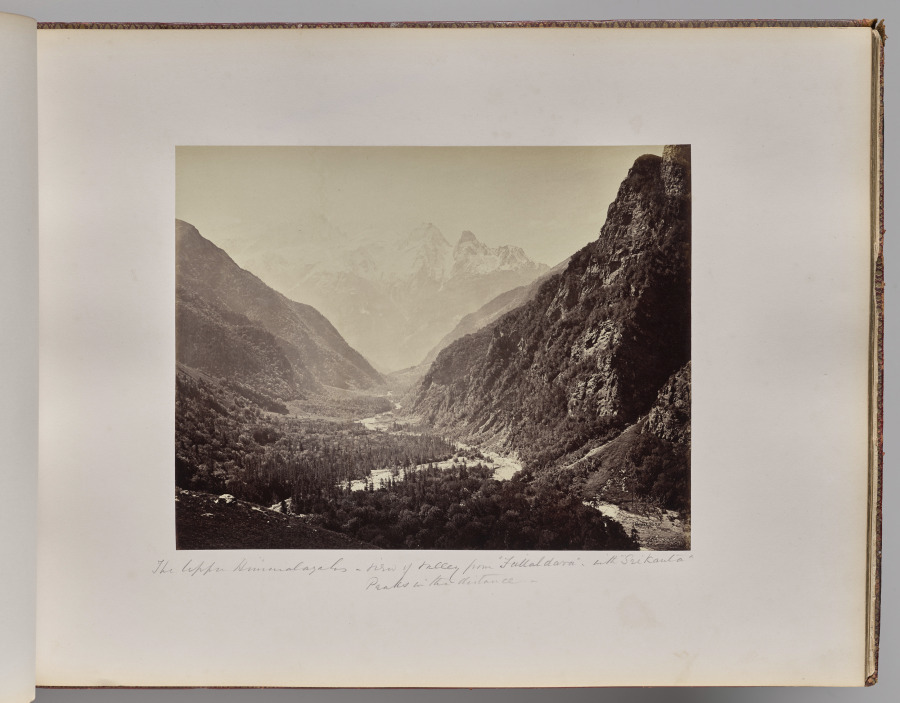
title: The Upper Himmalayahs. View of Valley from Fallaldasa with Srikanta Peaks in the Distance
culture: England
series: Photographs of Northern India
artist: Samuel Bourne (British, 1834–1912)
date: 1863–70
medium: albumen print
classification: Photograph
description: The 50 images in this album, all taken in the 1860s, move from the hill towns of the Himalayas down to cities including Lahore (now in Pakistan), Delhi, Lucknow, Agra, Benares (now Varansi), and Calcutta (now Kolkata). Architectural studies of major monuments offer valuable historical records of what sites such as the Taj Mahal and the imperial mosque of the Mughal emperors in Delhi looked like before twentieth-century restorations.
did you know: Samuel Bourne, the author of most the images in this album, was a banker in England before he moved to India to become a professional photographer.